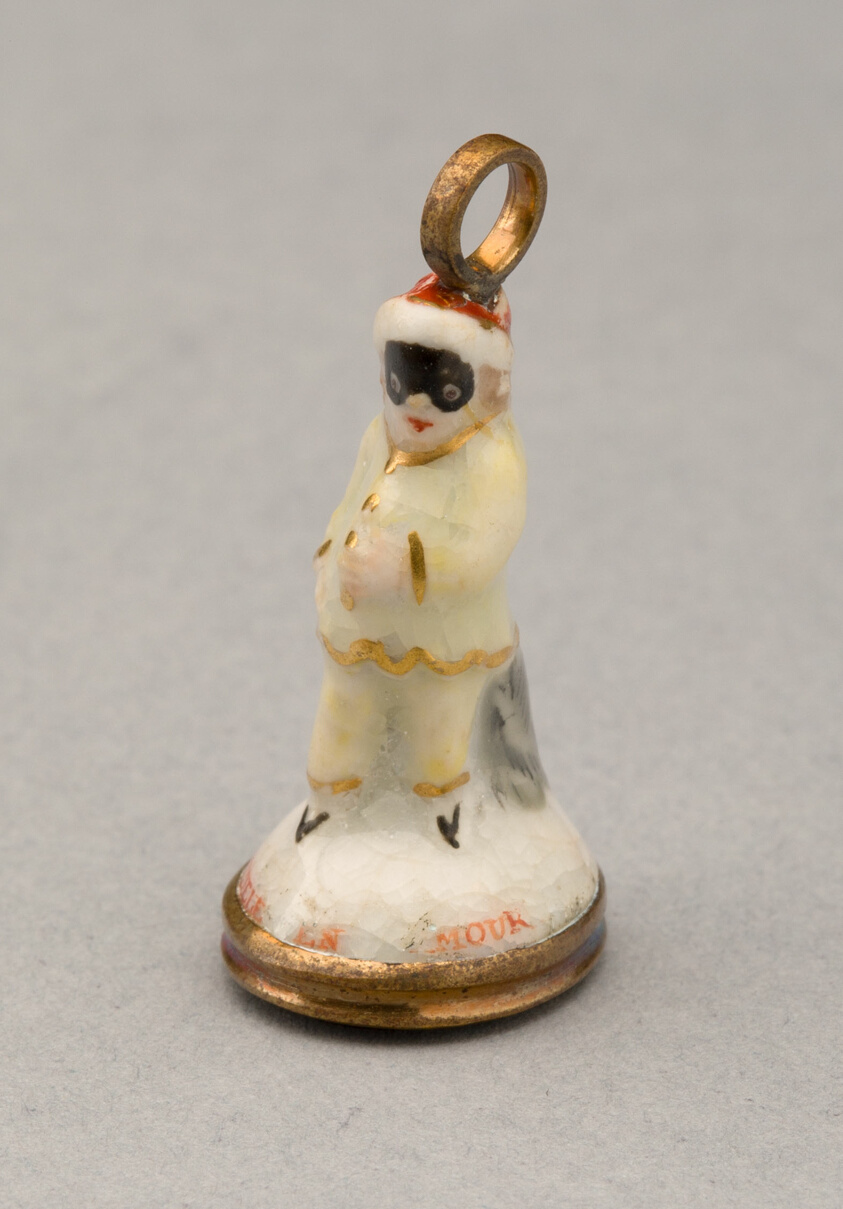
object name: Ceramics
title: Seal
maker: Chelsea Porcelain Manufactory; London, England, c. 1745-1784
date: 1750/70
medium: Soft-paste porcelain, polychrome enamels and gilding; hardstone and metal mount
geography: Chelsea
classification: porcelain; ceramics; european decorative arts